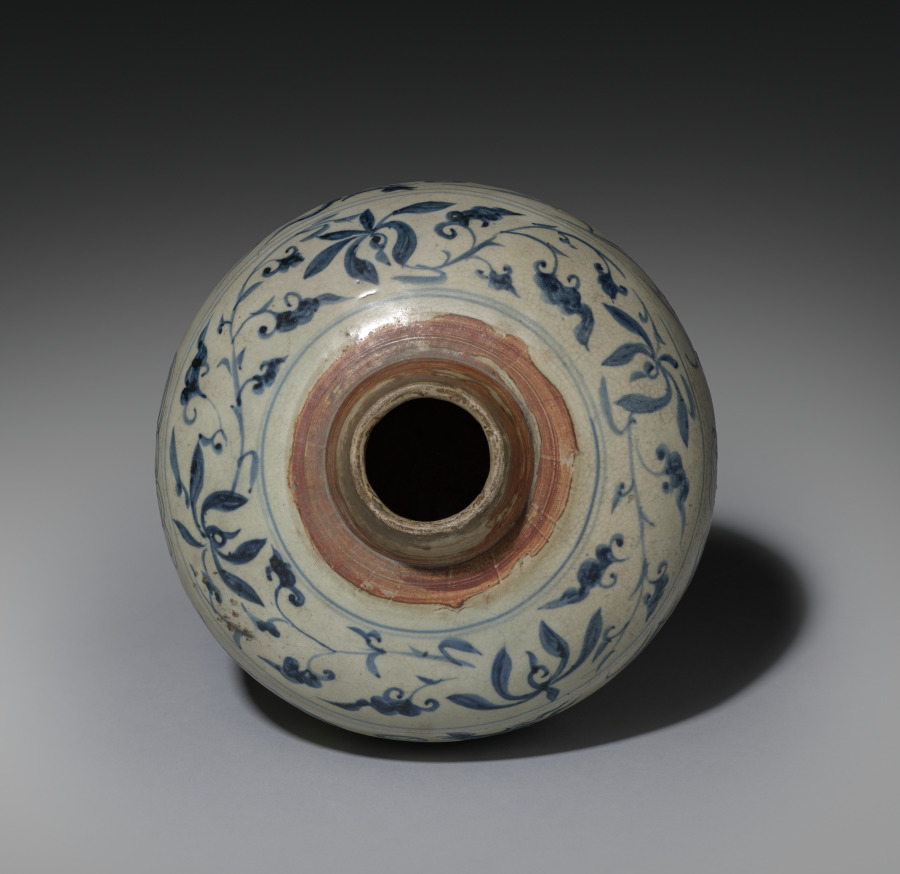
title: Covered Jar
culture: Vietnam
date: 1500s–1600s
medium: stoneware with blue and white decoration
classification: Ceramic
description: This stoneware ginger jar is decorated with a blue and white phoenix among clouds (a symbol of longevity) and floral motifs.